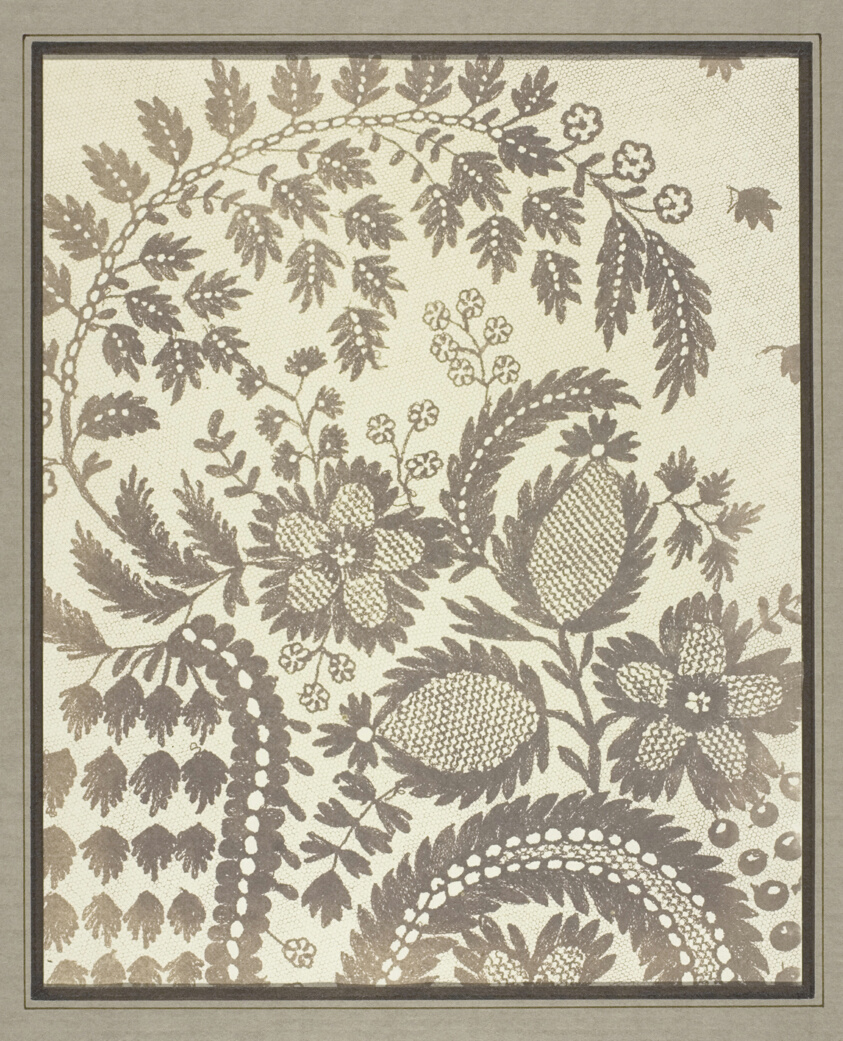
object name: Photograph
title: Lace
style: 19th century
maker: William Henry Fox Talbot (English, 1800–1877)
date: 1844/45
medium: Salted paper print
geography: England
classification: salted paper print; photographic process; photography; photograph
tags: Collected by Hugh Edwards